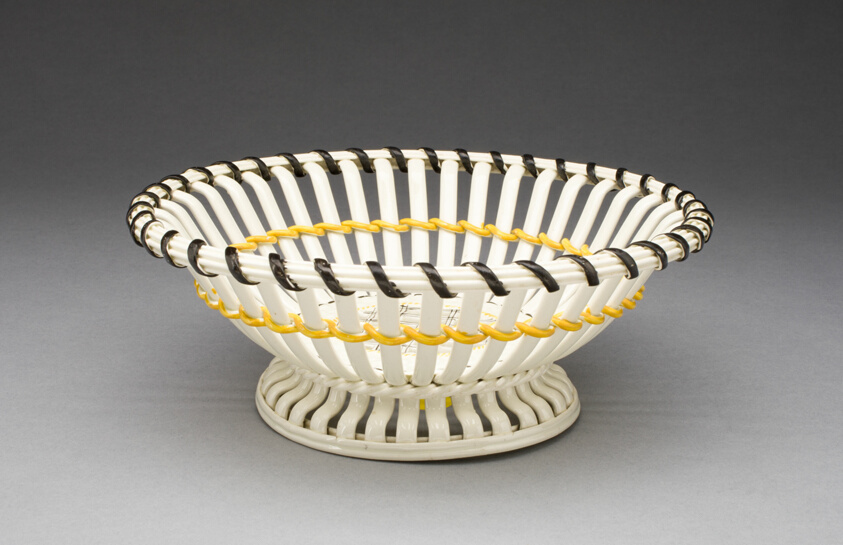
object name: Ceramics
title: Basket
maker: E. Mayer Pottery; English, Hanley, Staffordshire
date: 1780/90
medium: Lead-glazed earthenware (creamware)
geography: Staffordshire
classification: tableware; earthenware; european decorative arts; ceramics; creamware; lead-glazed earthenware